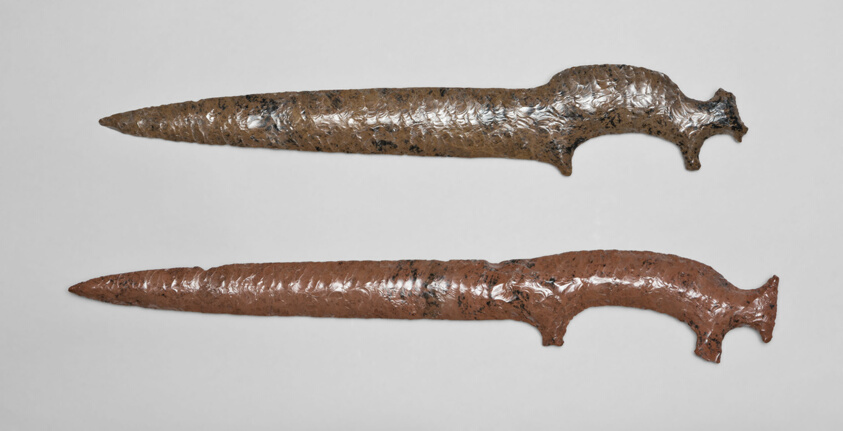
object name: Sculpture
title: Ceremonial Knife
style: colima, americas, mesoamerican, west mexico, Arts of the Americas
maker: Colima (Colima, Mexico)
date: c. 200 CE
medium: Obsidian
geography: Colima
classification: stone; art of the americas; ceremonial object; sculpture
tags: ceremonial objects, weapons